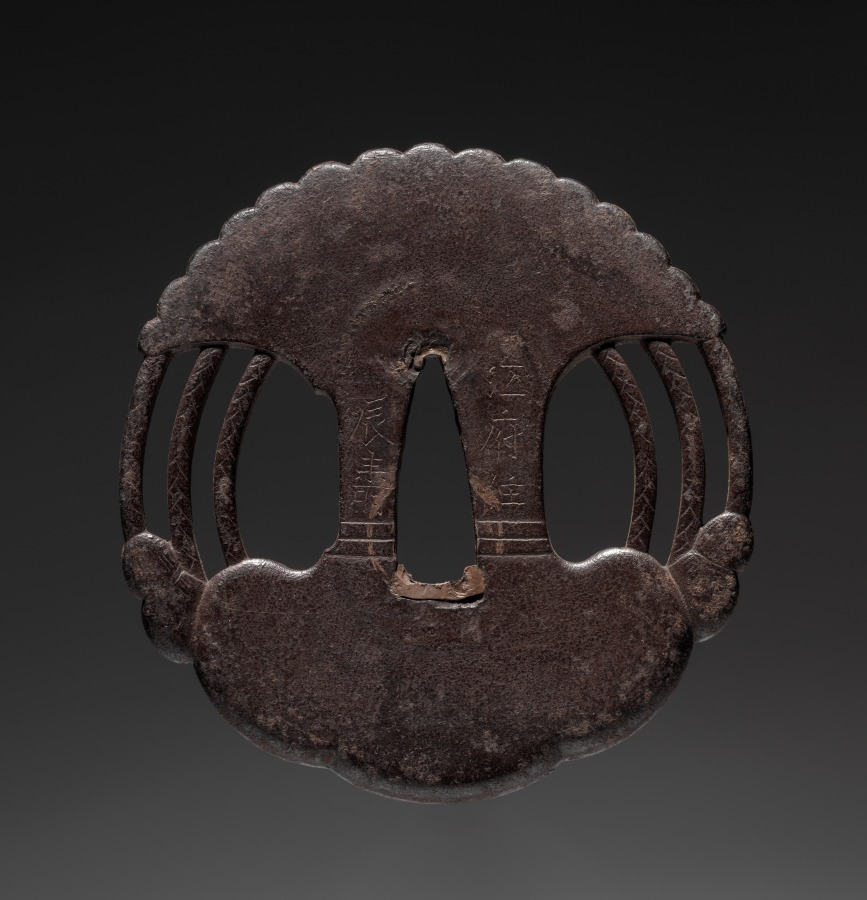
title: Sword Guard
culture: Japan, Edo period (1615–1868)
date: early 1800s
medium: iron (Akao type)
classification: Arms and Armor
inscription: signed "Tatsunaga, residing at Kofu [Edo]."